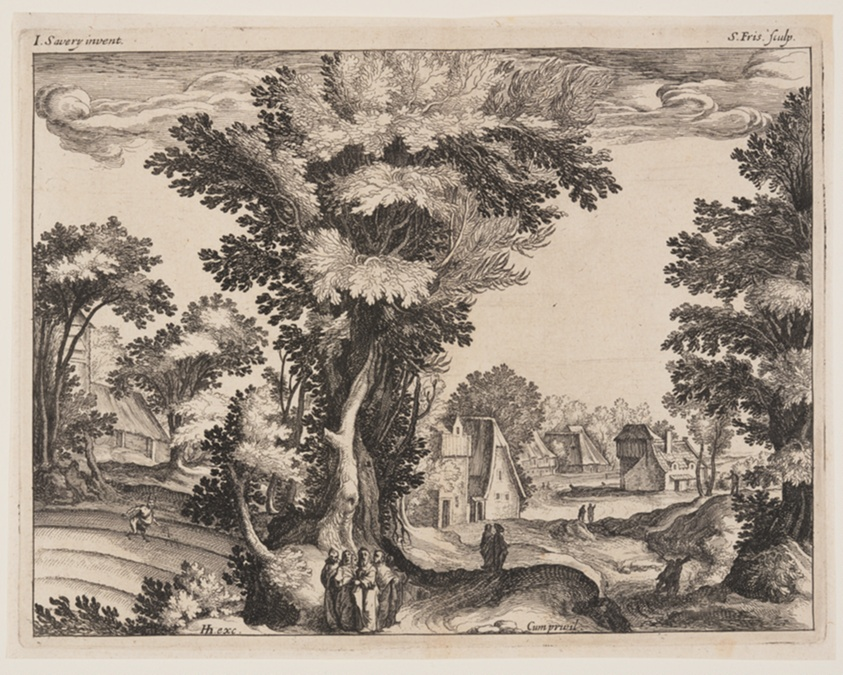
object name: Print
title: Parable of the Sower, from Landscapes with Scenes from the Life of Christ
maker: Simon Frisius (Dutch, c. 1580–1629); after Jacob Savery (Dutch, c. 1565-1603)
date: c. 1600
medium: Etching on ivory laid paper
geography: Netherlands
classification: etching; paper; print; prints and drawing